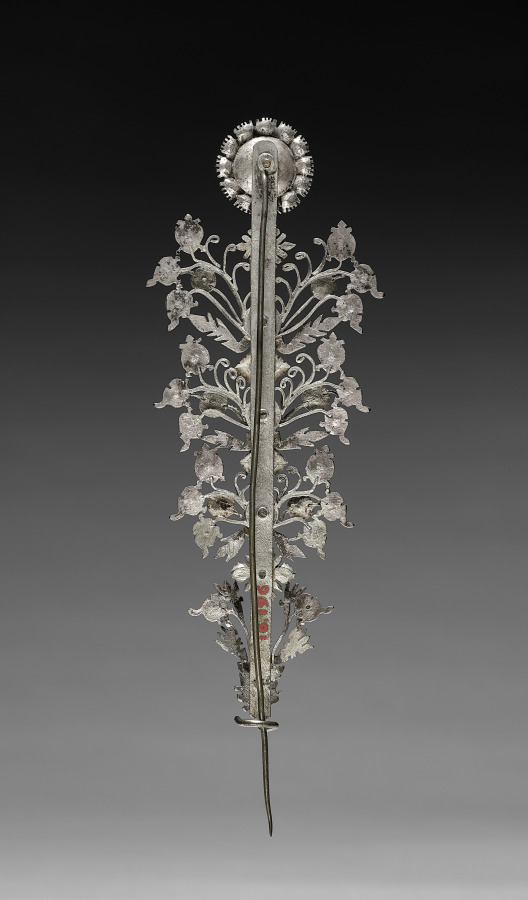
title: Turban ornament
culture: Java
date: 1800s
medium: silver and topaz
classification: Jewelry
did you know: Jakarta was previously known as Batavia and was a capital of the Dutch East Indies.